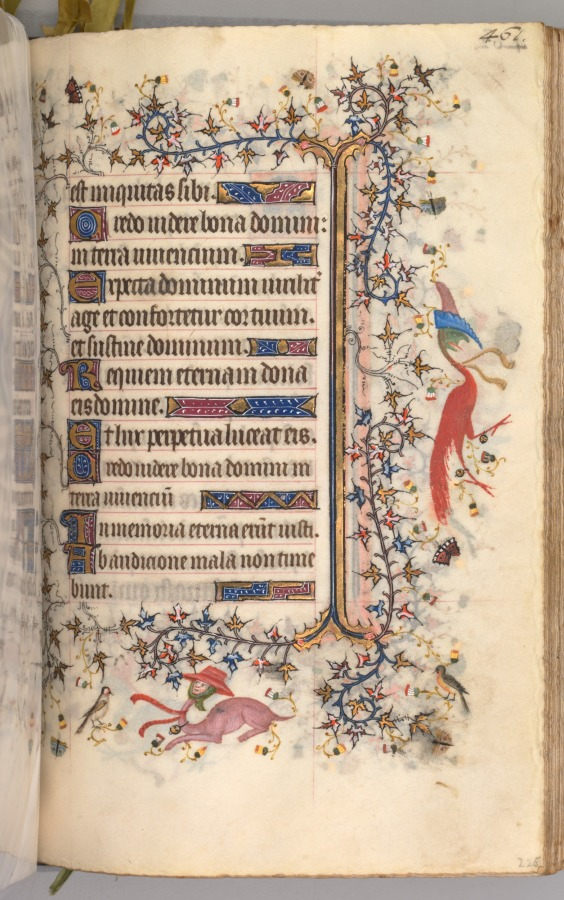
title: Hours of Charles the Noble, King of Navarre (1361-1425): fol. 225r, Text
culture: France, Paris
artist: Master of the Brussels Initials and Associates (French)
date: c. 1405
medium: ink, tempera, and gold on vellum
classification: Bound Volume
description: This precious volume was obviously highly prized by its owner, the French-born King of Navarre, who had his coat of arms painted on no less than twenty folios. Rather than directly commissioning this manuscript from a specific workshop, it seems that Charles the Noble acquired his book of hours -- perhaps ready-made for the luxury market -- while on a trip to Paris in 1404-05. A collaborative effort, six painting styles are evidenced within the pages of this codex, those of two Italians, two Frenchmen, and two Netherlanders. The painter who was responsible for the planning and decoration of the book, and who produced seventeen of the large miniatures, was a Bolognese artist known as the Master of the Brussels Initials. His principal assistant, responsible for most of the borders, was a Florentine who signed his name "Zecho" da Firenze on folio 208 verso.